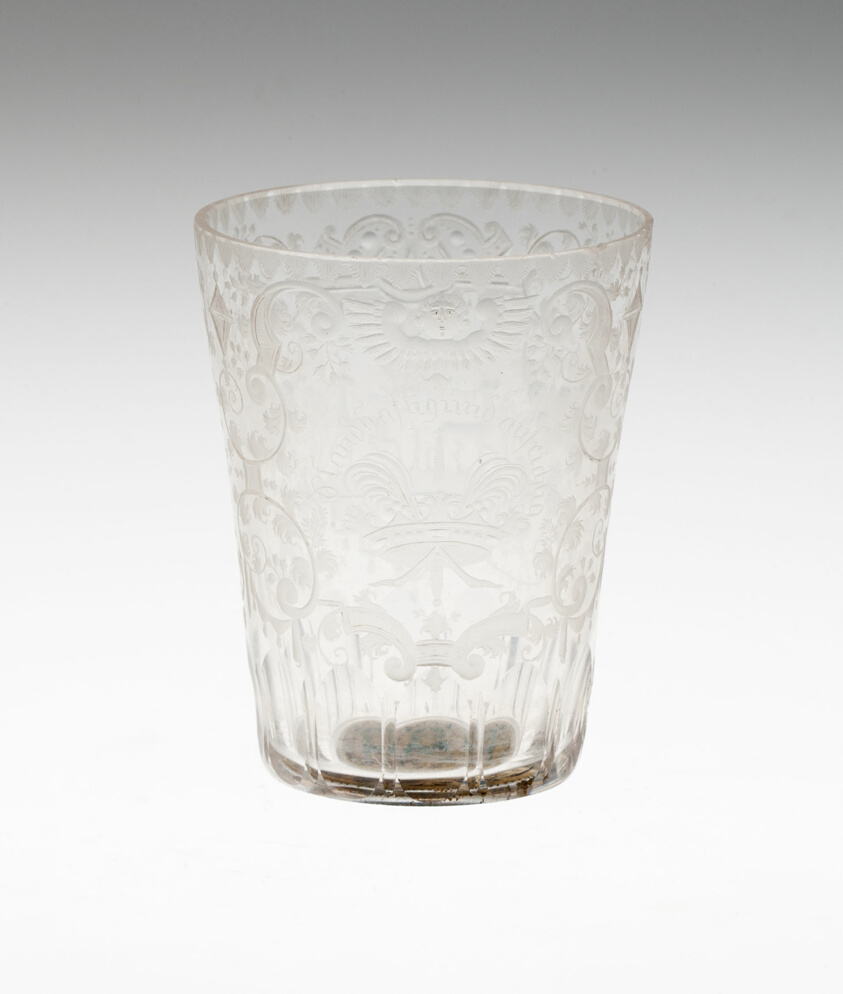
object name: Glass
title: Beaker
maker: Bohemia, Czech Republic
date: c. 1690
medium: Glass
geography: Bohemia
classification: drinking vessel; glass; european decorative arts